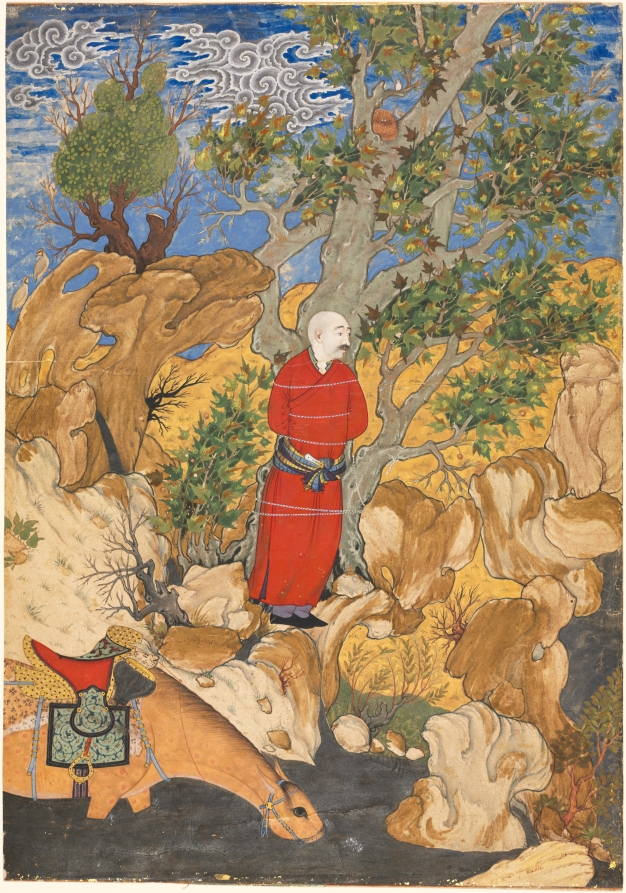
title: Aulad Tied to a Plane Tree, from a Shahnama by Firdausi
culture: Iran, Qazvin or Isfahan?, Safavid period (1501–1722)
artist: Sadiqi Bek (Iranian, 1533–1609)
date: 1575–1600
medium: opaque watercolor, gold, and silver on paper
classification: Manuscript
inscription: Signed in script by the artist.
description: This large-scale illustration reflects a new aesthetic with simpler paintings of isolated figures which artists signed for less sophisticated patrons in the marketplace, replacing the previous idealized court style as a result of decreased support under Shah ‘Abbas (reigned 1587–1629). Instead, he improved the infrastructure to increase international trade and the country’s wealth. The scene depicts Aulad, who guided the legendary hero Rustam through numerous ordeals. Since Aulad was not entirely trusted, Rustam often tied him to a tree, here a plane tree which shelters a pair of nesting birds. The painter, poet, and royal librarian Sadiqi Bek signed his name in tiny script on the brown rock below Aulad.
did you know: Rustam’s dappled horse named Raksh drinks water; it was originally silver, but has now oxidized to black.